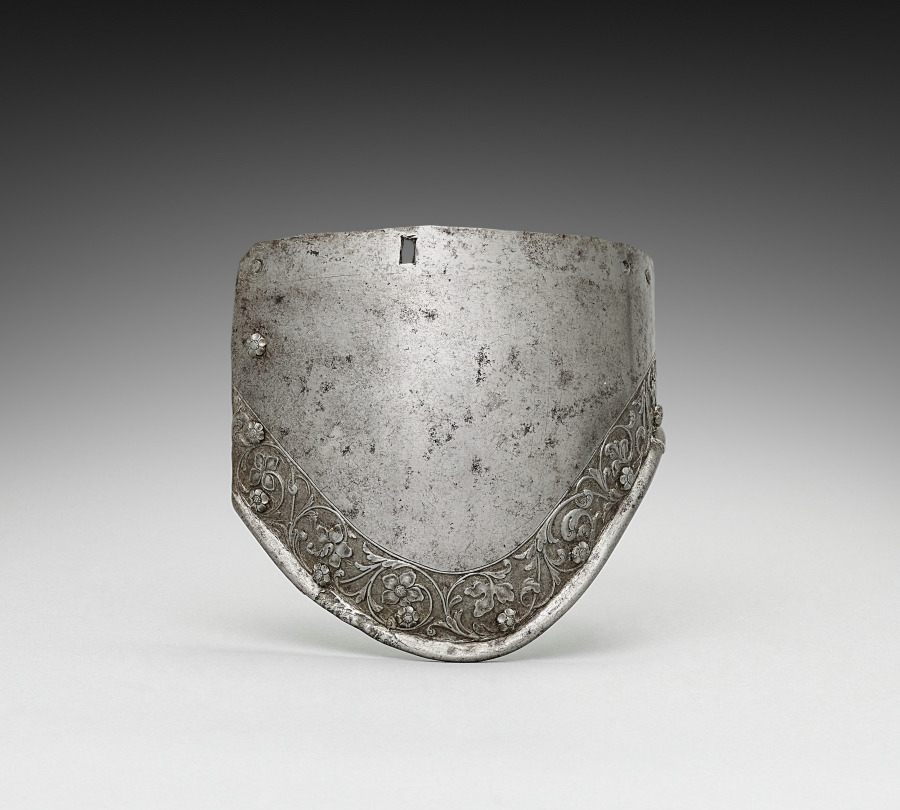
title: Upper Arm Canon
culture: Itlay, Milanese style of 16th century, probably 19th century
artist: attributed to Negroli Workshop (Italian, c. 1500–1561)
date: 1800s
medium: steel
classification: Arms and Armor